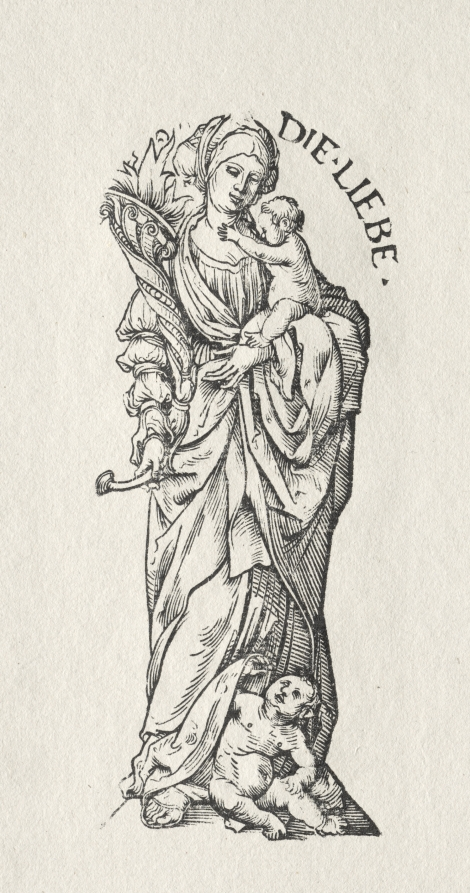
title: The Seven Virtues: Love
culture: Germany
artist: Hans Burgkmair (German, 1473–1531)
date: 1510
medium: woodcut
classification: Print